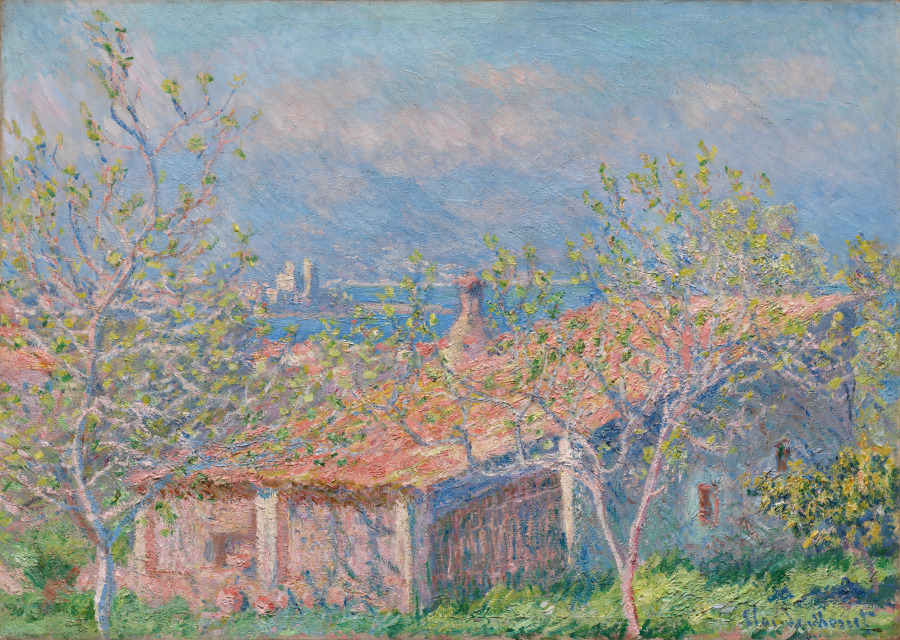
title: Gardener's House at Antibes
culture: France, 19th century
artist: Claude Monet (French, 1840–1926)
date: 1888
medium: oil on fabric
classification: Painting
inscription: Signed lower right: Claude Monet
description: In 1888, Claude Monet spent four months in Antibes, a city in southeastern France on the Mediterranean coast, to derive inspiration for painting. Although his visit was occasionally challenged by strong winds that threatened to knock over his easel, the artist was able to complete nearly 40 works. This especially vibrant canvas is a depiction of a gardener’s house set against the sea and the distant Alps. Monet portrays intense midday light through thickly applied paint in bright colors that evoke the region’s sun-drenched climate. Small daubs of green on the slender trees framing the house suggest the onset of spring.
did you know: Monet painted 35 canvases during his visit to Antibes from January to May 1888.